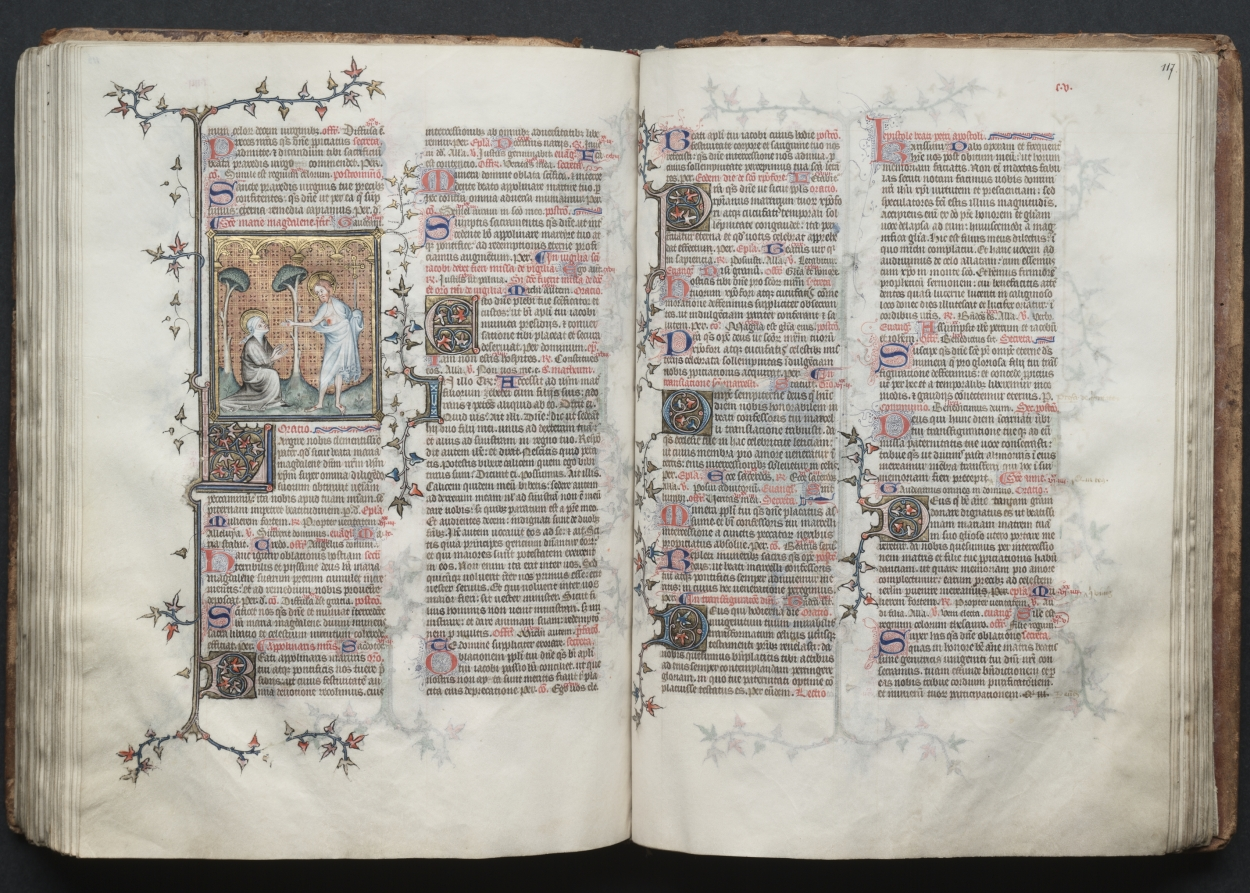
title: The Gotha Missal: Fol. 117r, Text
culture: France, Paris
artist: Master of the Boqueteaux (French)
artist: and Workshop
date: c. 1375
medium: ink, tempera, and gold on vellum; blind-tooled leather binding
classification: Bound Volume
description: The style and quality of this manuscript's decoration is typical of deluxe Parisian books made for aristocratic or royal patrons. Most of the book's decoration appears to be the work of the Master of the Boqueteaux, an artist active at the court of King Charles V (died 1380). His style was apparently shared by a number of book illuminators working in and around Paris. It is very possible that the Gotha Missal belonged to Charles V, but is not provable because the manuscript has no royal portraits and lacks a colophon. Given the book's magnificent decoration, however, it would seem that it was produced for a Valois prince, if not for the king himself. The manuscript receives its name from the German dukes of Gotha, its later owners.